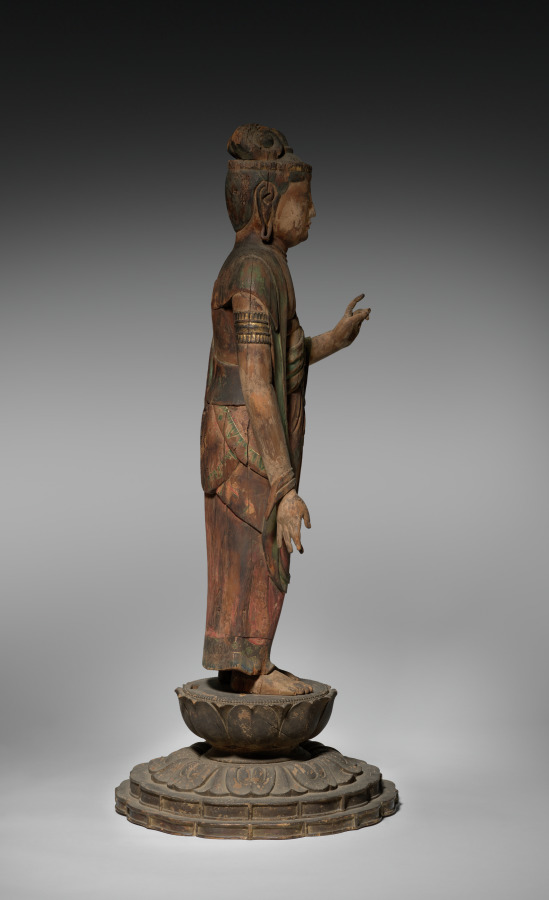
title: Shō Kannon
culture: Japan, Heian period (794–1185)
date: 900s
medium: Wood with traces of color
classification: Sculpture